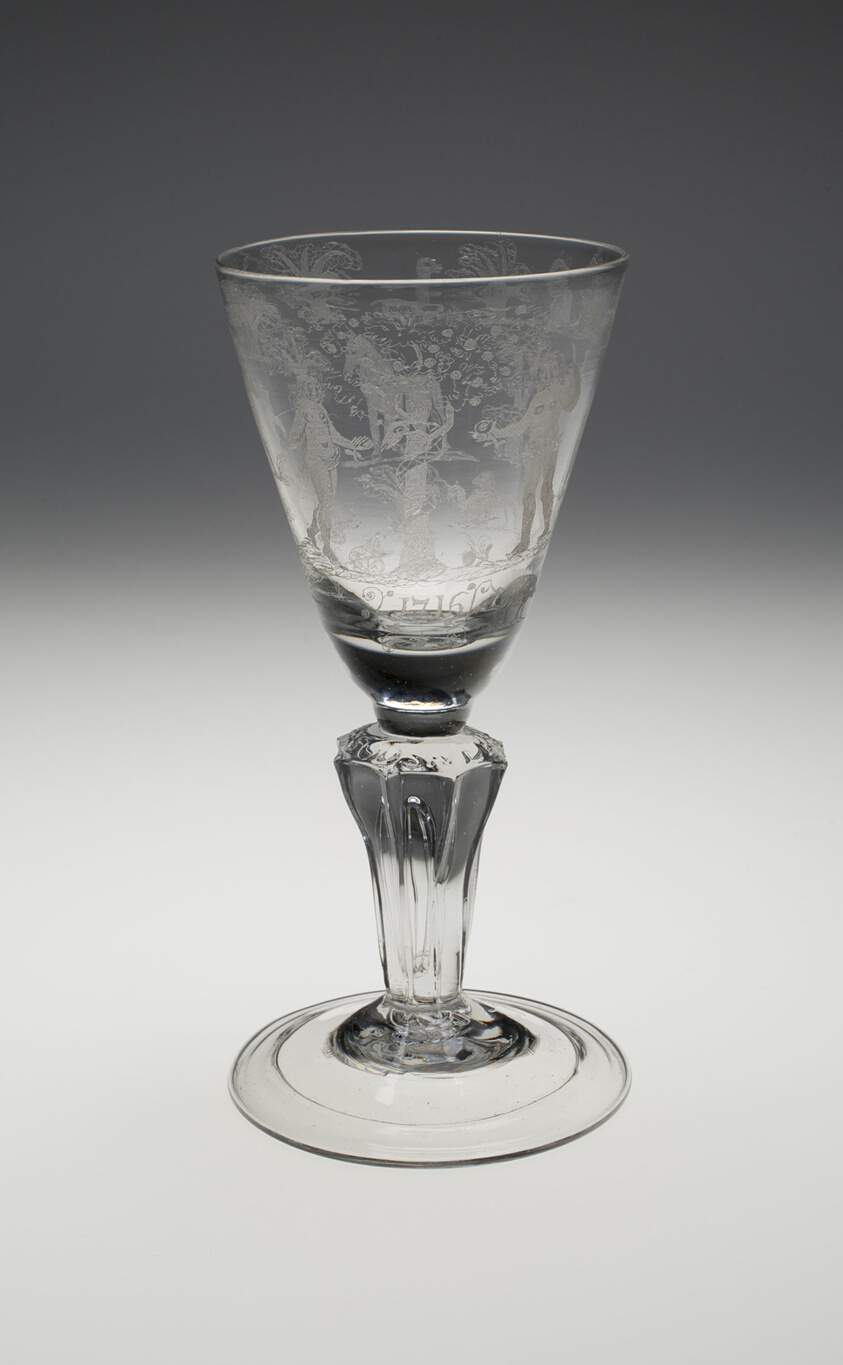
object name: Glass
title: Commemorative Wineglass for the Coronation of George I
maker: England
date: c. 1714 (Engraved 1716)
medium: Diamond-engraved lead glass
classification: drinking vessel; glass